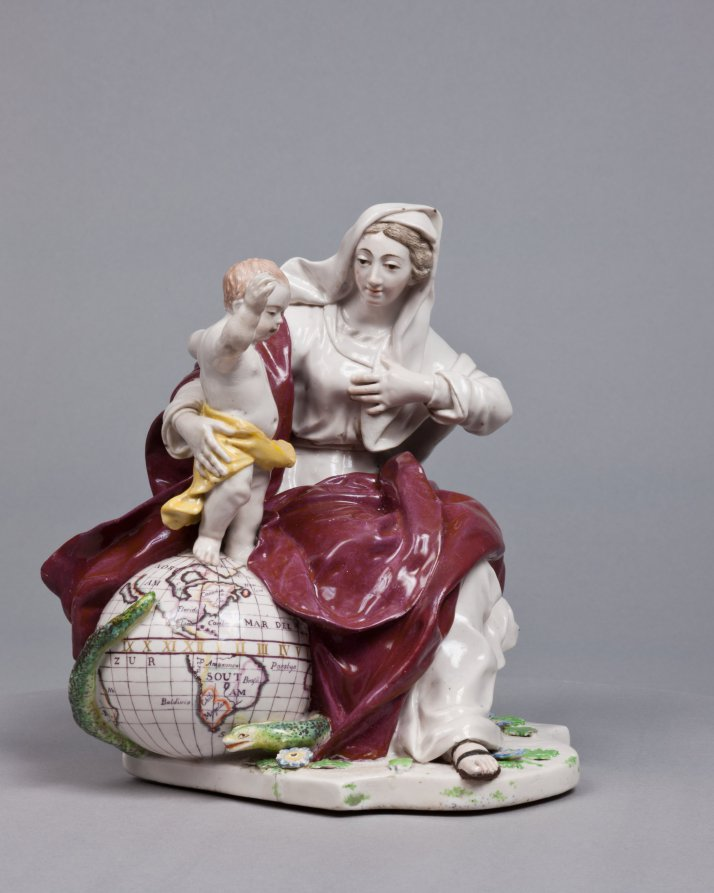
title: Madonna and Child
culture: England, Chelsea, 18th century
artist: Chelsea Porcelain Factory (Britain, London, 1745–84)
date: c. 1755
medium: porcelain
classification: Ceramic